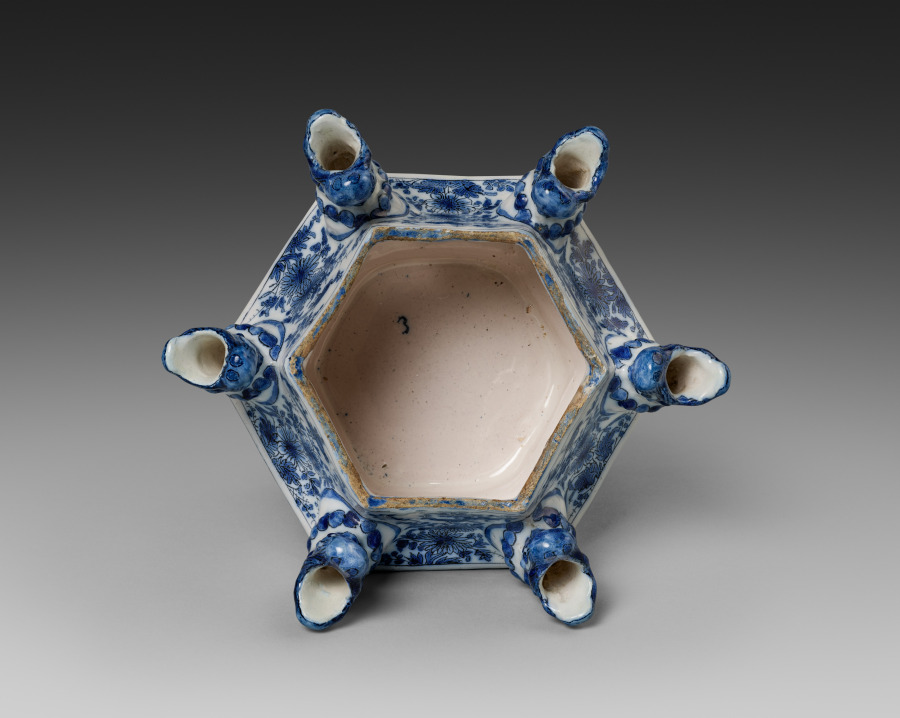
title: Third Tier for a Flower Pyramid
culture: Netherlands, Holland, Delft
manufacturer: Adrianus Kocx (Dutch, active 1686–1701)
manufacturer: De Grieksche A (The Greek A) Factory (Netherlands, 1658–1811)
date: c. 1690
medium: Tin-glazed earthenware, painted in blue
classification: Ceramic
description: Allegorical figures representing Faith, Hope, and Love decorate the base of this pyramid, on which rest six tiers with spouts where flowers can be placed. Flower pyramids are among the most complex and luxurious types of ceramics produced in Delft in the late 1600s. This example was made in the Greek A Factory, owned by Adrianus Kocx. During his tenure, the factory became the most prestigious of Delft potteries and received commissions from Queen Mary II, who ruled over England, Scotland, and Ireland together with her husband, William III. She contributed to the international spread of the fashion for Delft ceramics.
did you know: The iconic blue-and-white ceramics from Delft originated as an attempt to copy Chinese porcelain.